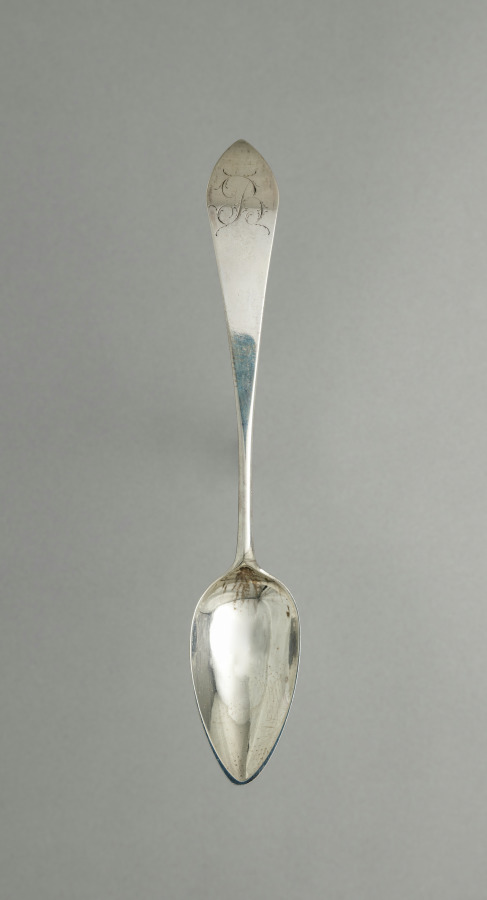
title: Teaspoon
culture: America, New Hampshire, Portsmouth, early 19th Century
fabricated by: Timothy Gerrish (American, 1749–1815)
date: 1804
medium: silver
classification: Silver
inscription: engraved "B" in bright-cut script on top of handle end.